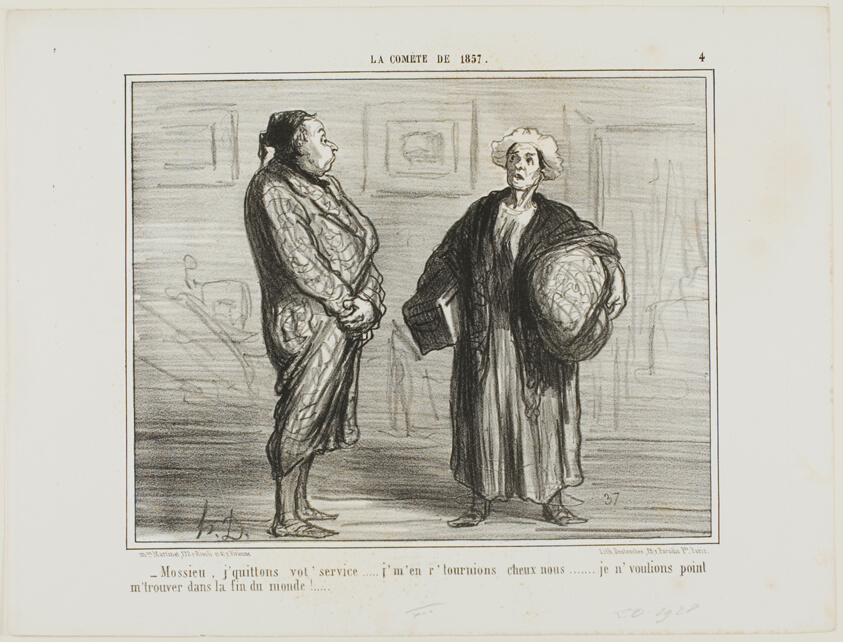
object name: Print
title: “- Monsieur, I quit your service, I am going home... I don't want to be here when the world ends,” plate 4 from La Cométe De 1857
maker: Honoré Victorin Daumier; French, 1808-1879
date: 1857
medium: Lithograph in black on white wove paper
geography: France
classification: lithograph; print; prints and drawing